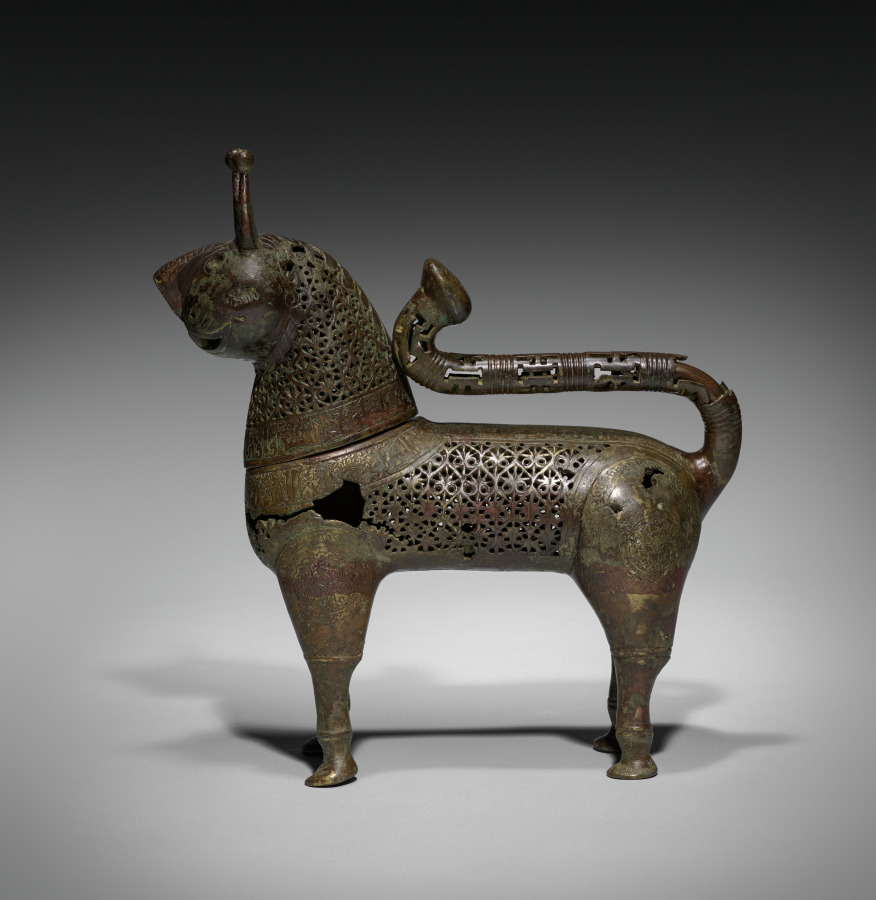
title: Feline Incense Burner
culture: Iran, Khurasan, Seljuq period of Iran (1037–1194)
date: 1150–1200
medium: Copper alloy, cast, engraved, chased, and pierced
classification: Metalwork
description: In Iran during the 1000s and 1100s, vessels in the shape of animals gained popularity, especially as incense burners. Felines were favored in Persian art and this piece may represent a caracal, a type of lynx. The head of the creature was cast separately and is removable to fill its body with hot coals and incense. Qur’anic verses on the neck and spine remind worshippers to set work aside, attend prayer, and then disperse to seek God’s bounty. The diffusion of perfumed smoke through the burner’s pierced palmette design may have served as a sensorial reminder of this teaching.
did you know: Arabic inscriptions in Kufic script against a background of scrolling arabesques run along the back and neck of the feline form.